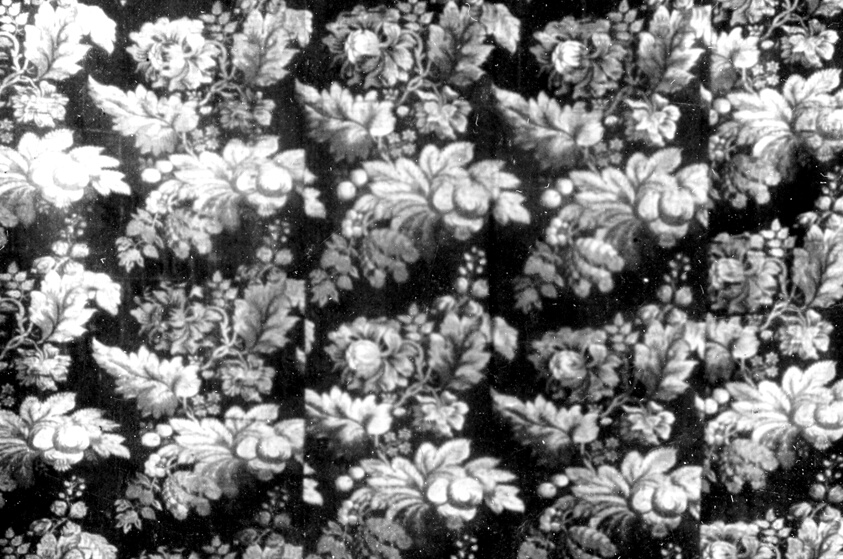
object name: Textile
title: Panel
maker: France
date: 1725/75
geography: France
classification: textile; weaving